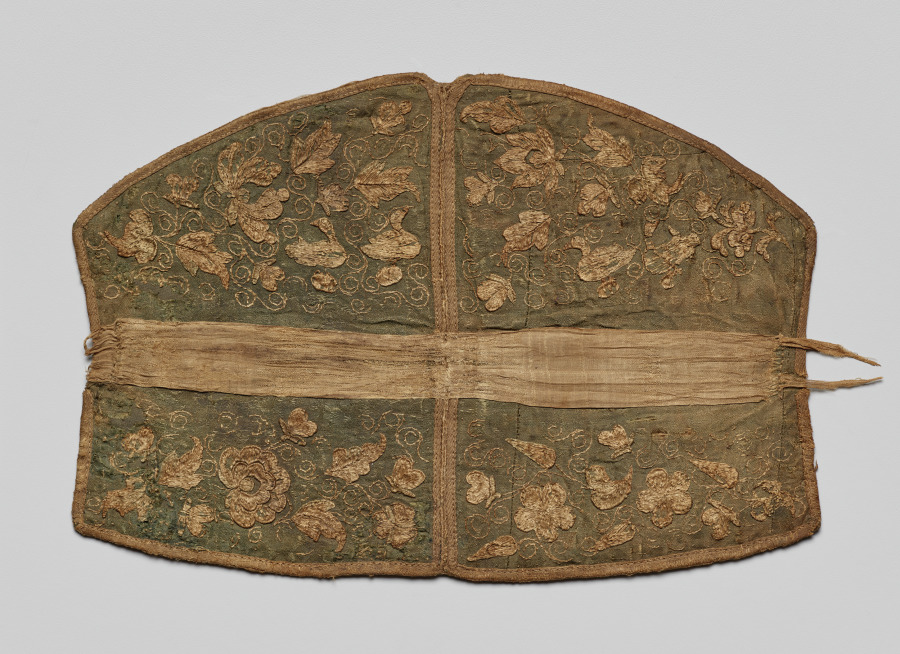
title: Headpiece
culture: China, Liao dynasty (907-1125)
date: 907–1125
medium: embroidery, silk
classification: Embroidery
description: These headpieces are embroidered with butterflies, birds, animals, flowers, leaves, and delicate vine scrolls. In general, the design is related to the theme of the lotus pond, best known from Liao tomb paintings. Paired ducks or geese swimming in water and looking in opposite directions seem to have become popular in the north of China before spreading further south and to Central Asia. On the other hand, recumbent animals looking back are a Central Asian image that migrated to northern China. Headpieces of this shape, intersected by two bands and secured by ties, have a long history in northern China. A gold replica was found in a tomb dating as early as 500–550.